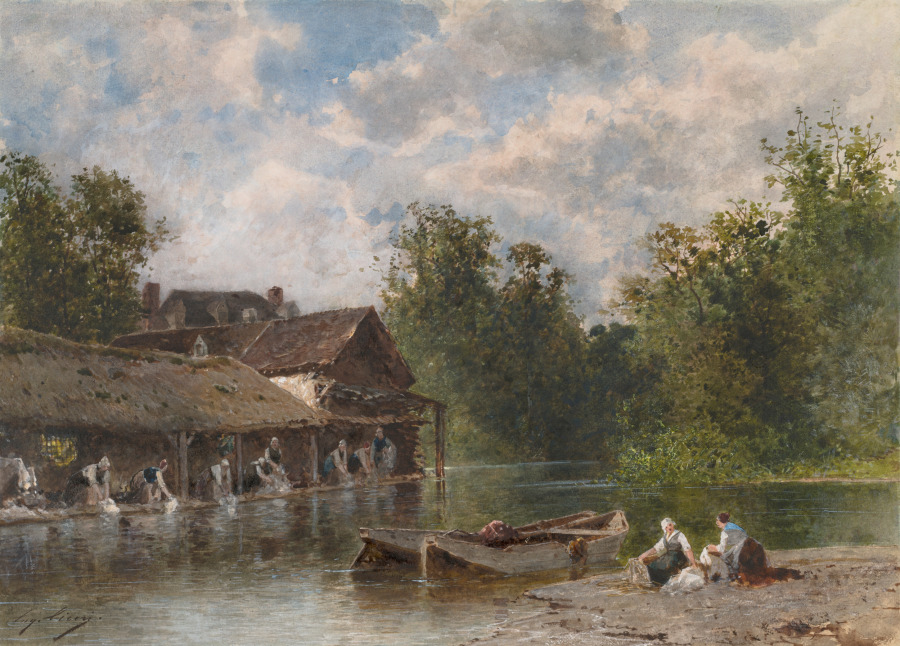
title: Les Lavandières (Washerwomen)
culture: France, 19th century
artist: Eugène Cicéri (French, 1813–1890)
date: 1870–1880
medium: Watercolor with gouache and gum arabic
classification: Drawing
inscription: lower left, in brown watercolor: Eug. Ciceri